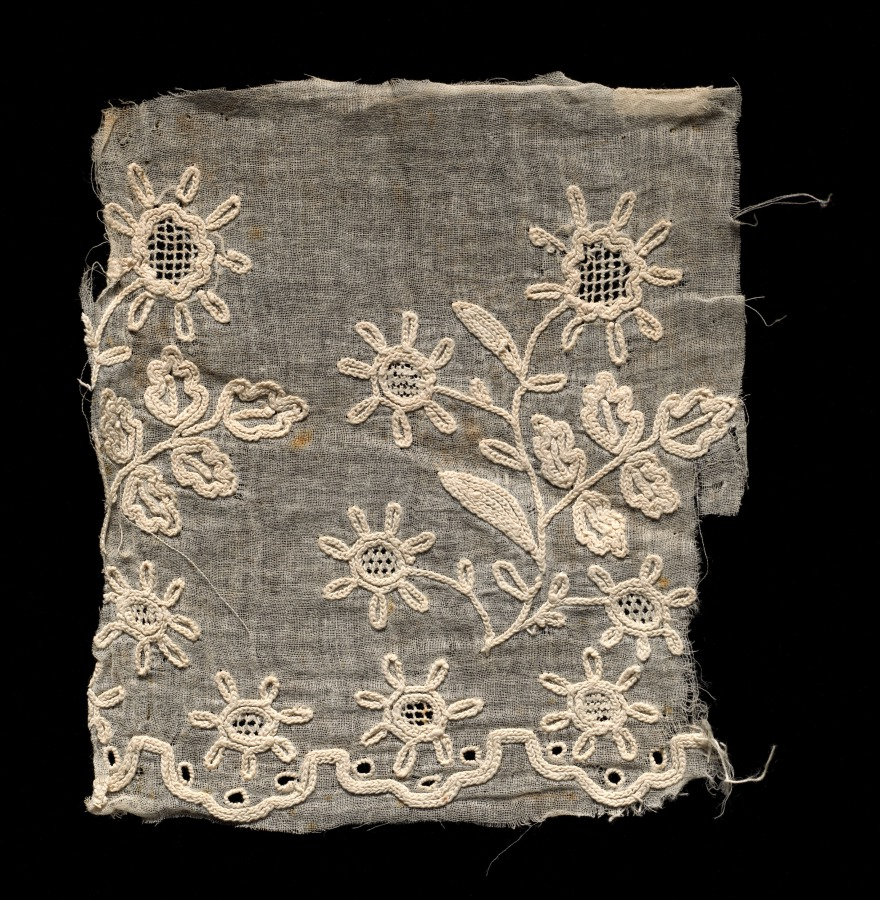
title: Lace Fragment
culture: Spain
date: 1700s–1800s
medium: Plain weave cotton: lace (drawnwork) and chain stitch embroidery (tambour work)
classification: Embroidery